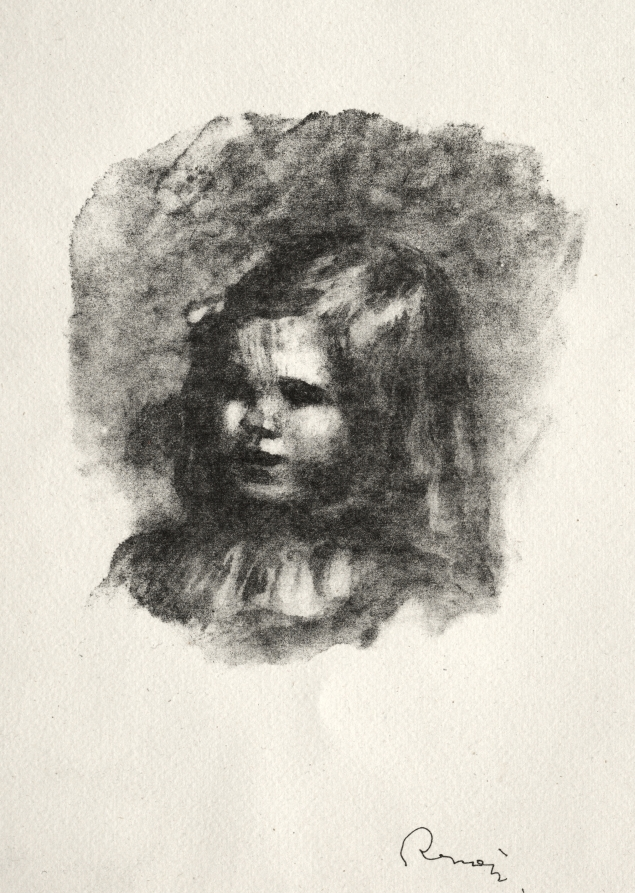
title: Claude Renoir, Turned to the Left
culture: France, late 19th-early 20th century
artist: Pierre-Auguste Renoir (French, 1841–1919)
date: 1904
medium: lithograph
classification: Print